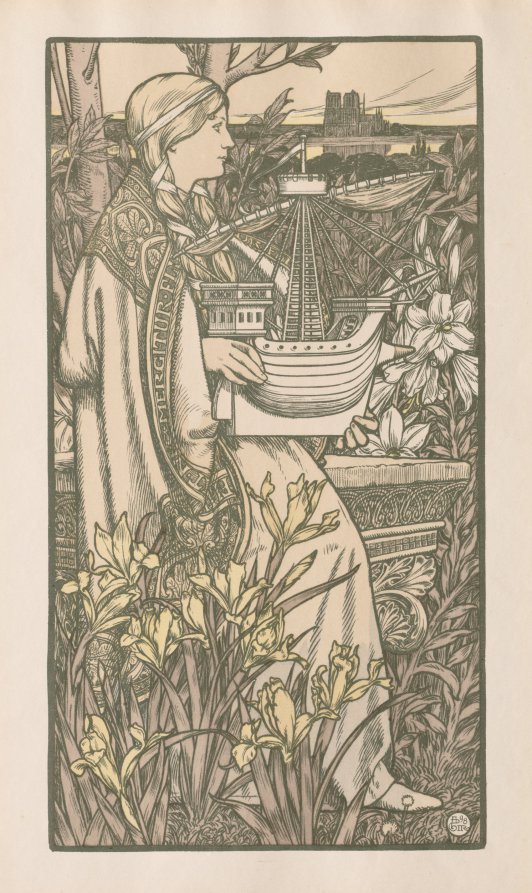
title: Lutèce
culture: France, 19th century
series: published in L'Estampe Moderne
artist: Adolphe Giraldon (French, 1855–1933)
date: 1898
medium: color lithograph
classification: Print